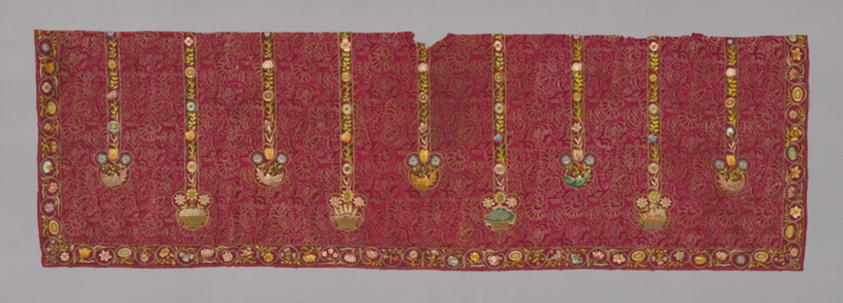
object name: Textile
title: Panel (Showing Symbols of the Four Seasons)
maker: France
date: 17th century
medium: Silk, satin weave self-patterned by reversing of faces; embroidered with silk floss, gold and silver gilt strips wound around silk fiber cores, in cross, running, satin, padded satin and split stitches; French knots; couching and laidwork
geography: France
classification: textile; needlework (visual works)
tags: fashion